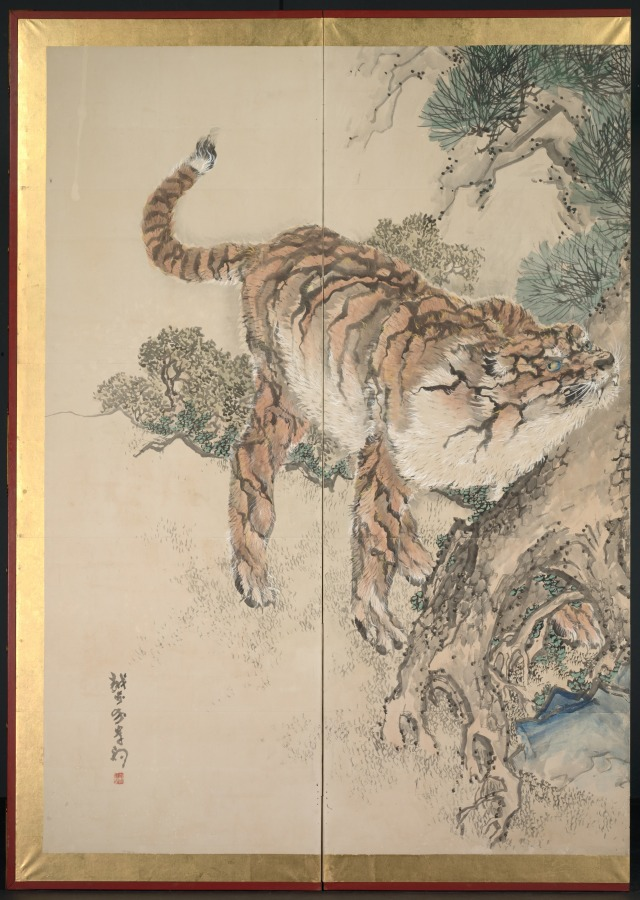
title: Tiger Family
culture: Japan, Edo period (1615–1868)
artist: Kishi Ganku (Japanese, 1749/56–1838)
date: early 1800s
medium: One of a pair of six-panel folding screens; ink and color on paper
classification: Painting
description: By the time this self-taught painter reached his thirties, his paintings were keenly sought after by Kyoto’s sophisticated patrons, including members of the imperial family. Judging from the surviving works, his supporters delighted in the colorful, auspicious imagery of Chinese historical figures, blossoming plum trees, cranes, peacocks, roosters, and especially tigers. Kishi Ganku was originally from the coastal town of Kanazawa, but relocated to Kyoto to work for the Arisugawa family. His work incorporates stylistic elements from the Kano school, the Maruyama school, and works by the Chinese artist Shen Nanping (1682–1760).